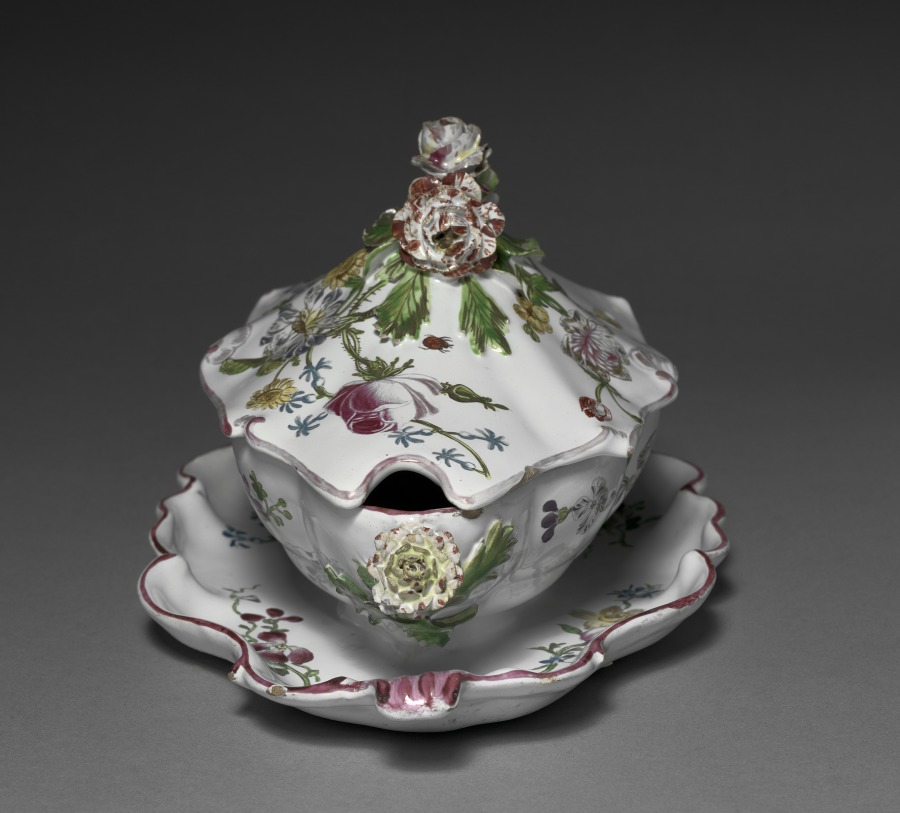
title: Covered Sauce Tureen with Attached Stand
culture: France, Marseilles, 18th century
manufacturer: Veuve Perrin Factory (French)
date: c. 1765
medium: tin-glazed earthenware (faience) with enamel decoration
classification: Ceramic